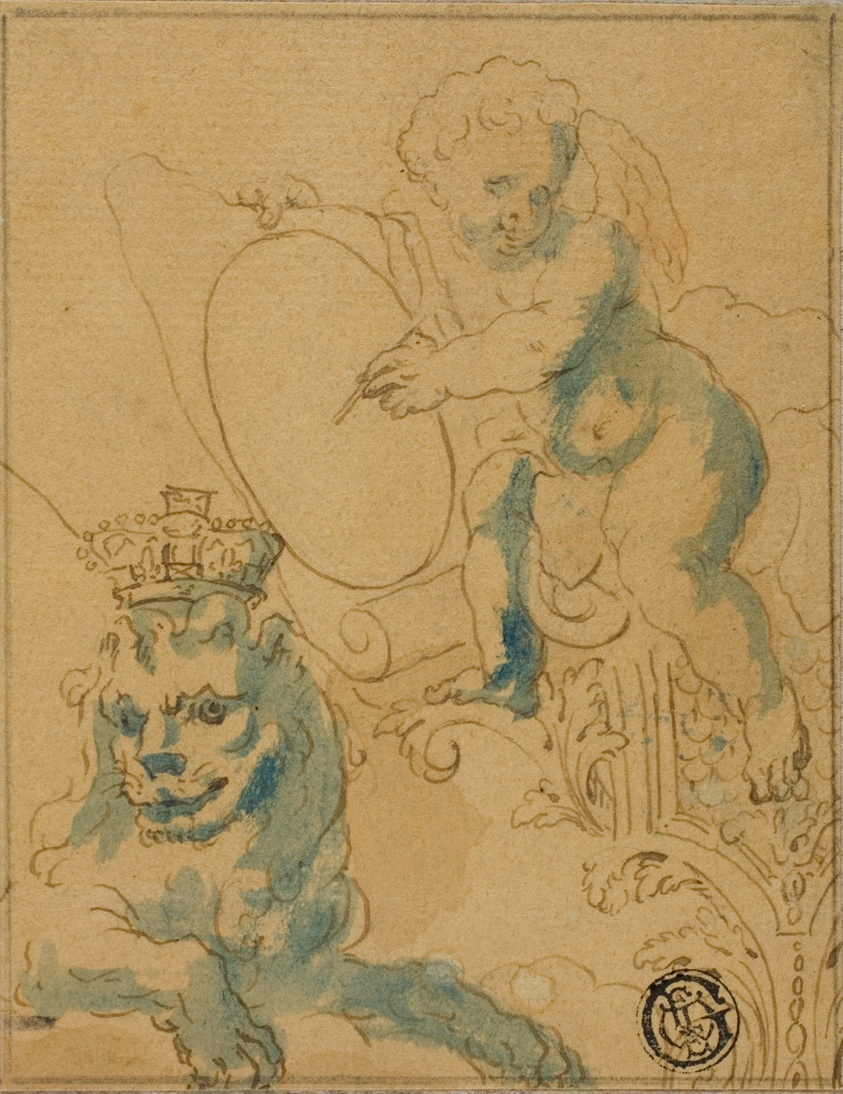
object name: Drawing and Watercolor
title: Section of Ceiling Decoration with Cupid with Scroll and Lion with Crown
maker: Unknown Artist; Italian, 17th century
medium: Pen and brown ink, with brush and blue watercolor, on tan laid paper, laid down on blue wove paper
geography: Italy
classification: pen and ink drawings; drawings (visual works); prints and drawing